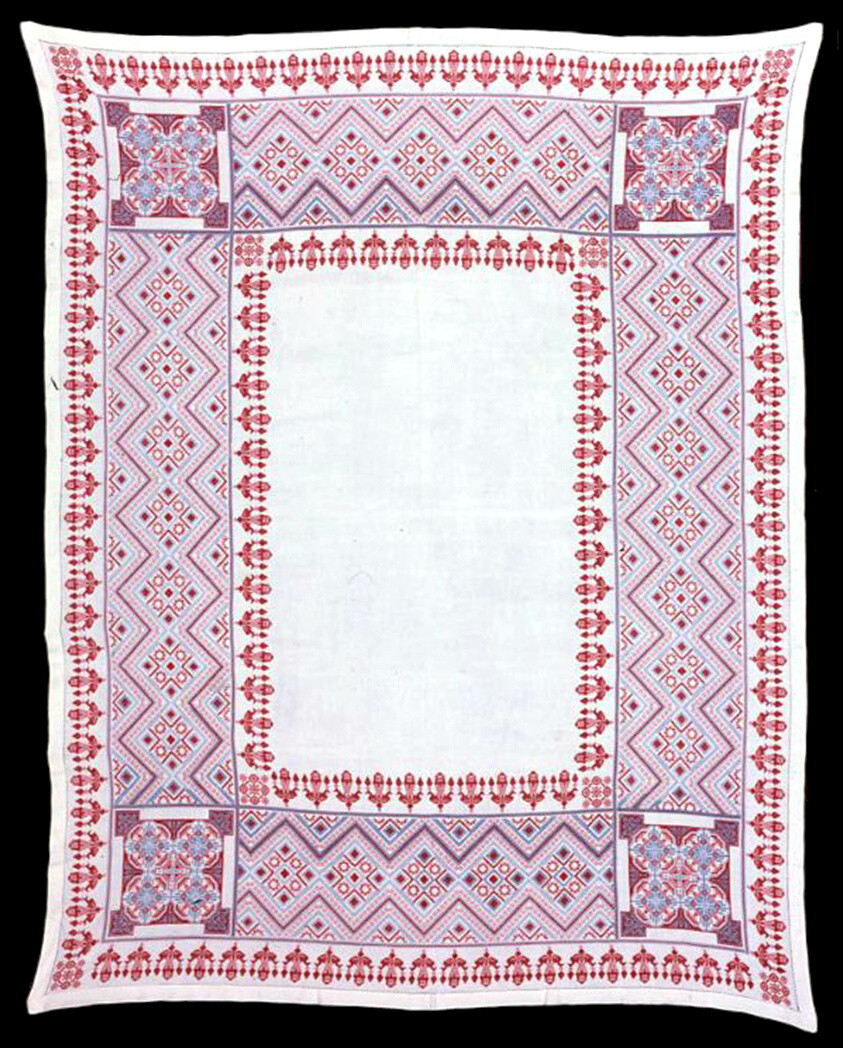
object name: Textile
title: Tablecloth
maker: Ukraine or Yugoslavia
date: c. 1860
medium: Linen, plain weave; cut and drawn work embroidered with cotton yarns in Vandyke stitch; and embroidered with cotton yarns in cross stitch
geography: Ukraine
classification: textile; needlework (visual works)